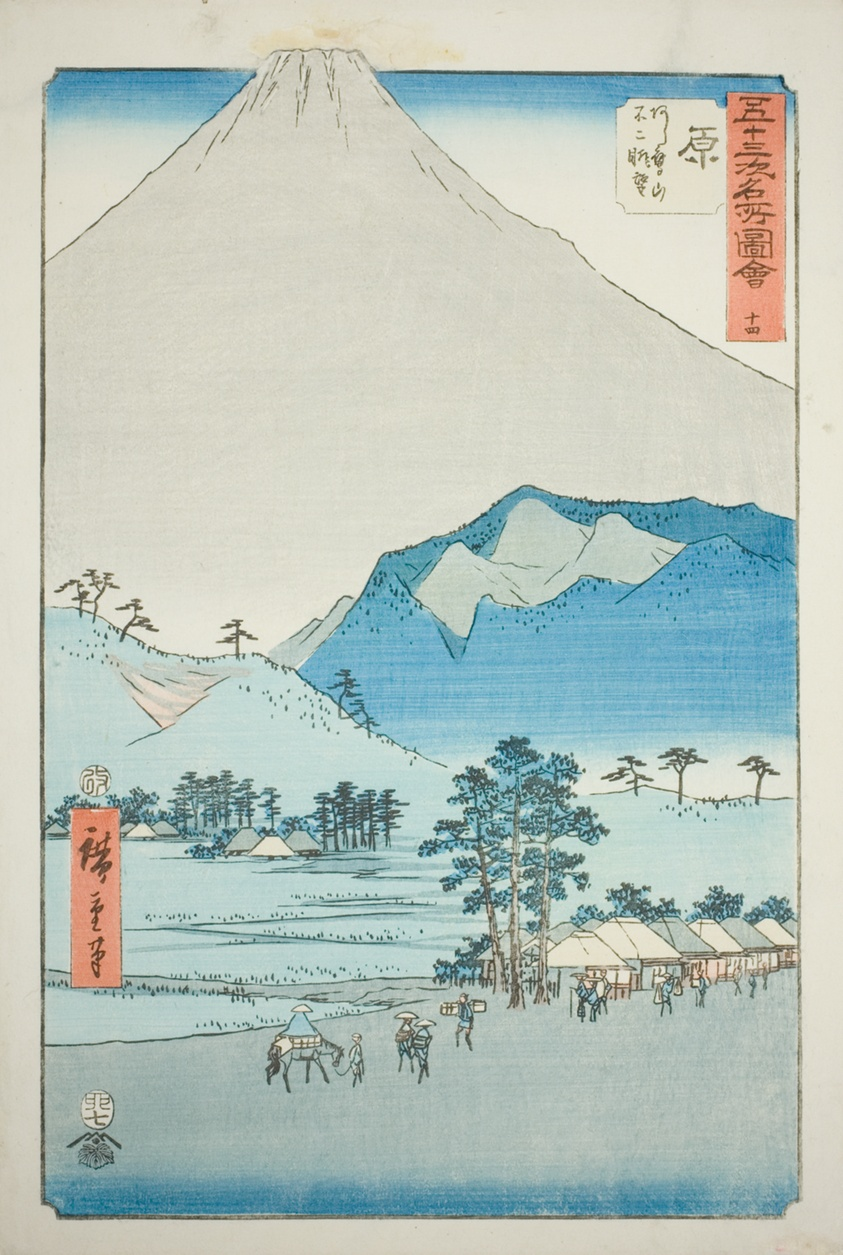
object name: Print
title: Hara: View of the Ashitaka Mountains and Mount Fuji (Hara, Ashitakayama Fuji chobo), no. 14 from the series "Famous Sights of the Fifty-three Stations (Gojusan tsugi meisho zue)," also known as the Vertical Tokaido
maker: Utagawa Hiroshige 歌川 広重; Japanese, 1797-1858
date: 1855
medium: Color woodblock print; oban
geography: Japan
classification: woodblock print; print; asian art